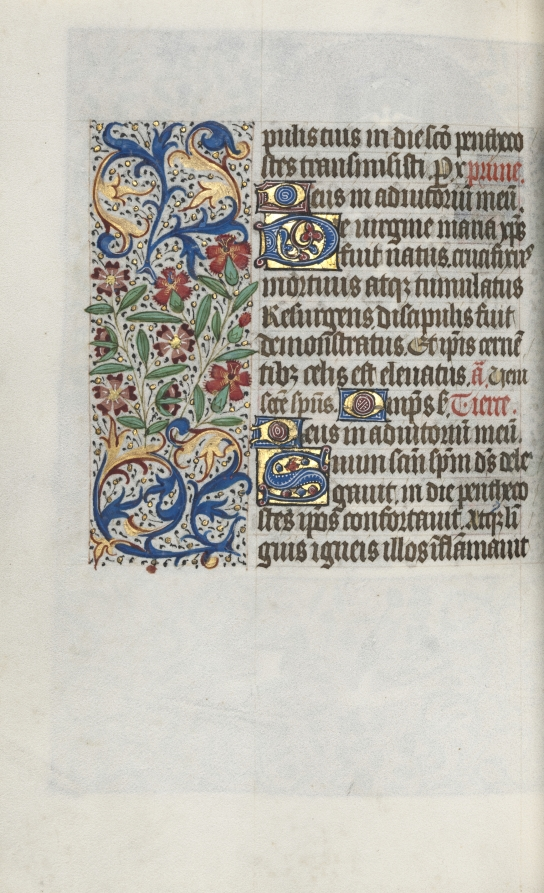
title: Book of Hours (Use of Rouen): fol. 100v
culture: France, Rouen, 15th century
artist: Master of the Geneva Latini (French, active Rouen, 1460–80)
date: c. 1470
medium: ink, tempera, and gold on vellum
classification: Bound Volume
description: In the late 1400s and early 1500s Rouen was an established and important center of book production. The city’s cathedral had a wealthy chapter that spent large sums of money to commission books and to maintain its extensive library. The stationers and booksellers would have likely been concentrated in or near the cathedral precinct. This artist, named after a manuscript now in Geneva, was Rouen’s principal illuminator during the second half of the 1400s.